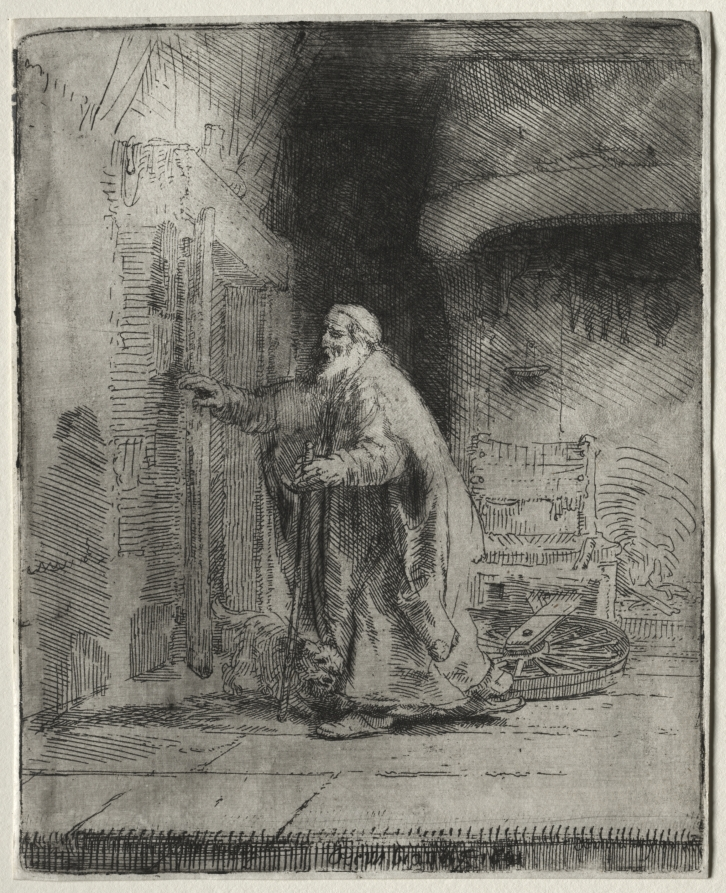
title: The Blindness of Tobit: The Large Plate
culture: Netherlands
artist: Rembrandt van Rijn (Dutch, 1606–1669)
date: 1651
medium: etching and drypoint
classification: Print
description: Having sent Tobias to collect a debt, a blind Tobit knocks over his wife’s spinning wheel and gropes for the door in his excitement to see his long-absent son. Rembrandt selectively inked and wiped the plate of this beautiful impression to enhance the scene’s meaning. The dark ink left behind the figure accentuates Tobit’s isolation and makes his beard-the only area of the print without any ink-seem even brighter, dramatizing the father’s anguished expression. Tobit’s shadow is cast by the firelight onto the wall to the far left of the doorway, symbolizing how far he has strayed from his goal and the poignancy of his condition.